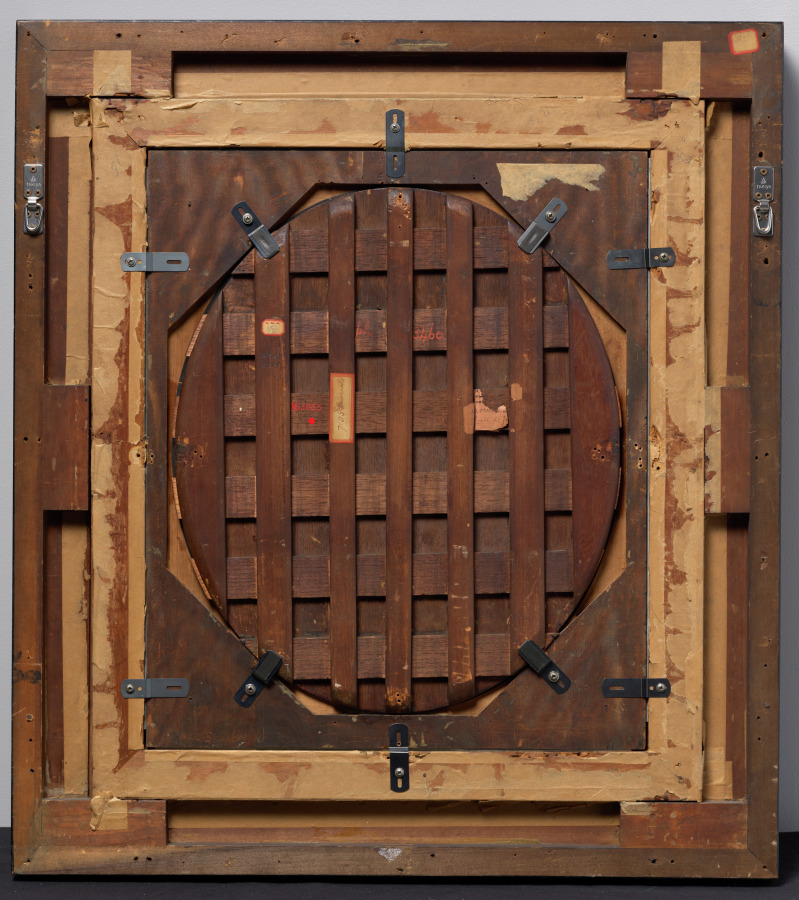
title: Portrait of a Woman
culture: Netherlands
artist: Jan Anthonisz. van Ravesteyn (Dutch, c. 1570–1657)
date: 1620s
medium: oil on wood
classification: Painting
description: How do you conserve a painting when portions are missing? The mid-treatment image (below) shows the painting after cleaning, when earlier restorations had been removed. In the painting on view, notice how the conservator reconstructed portions of the sitter’s lace collar and elaborate necklace. She re-created missing passages after studying the artist’s technique in other works and carefully emulating his treatment of the remaining lace and elements of the twisting, three-dimensional necklace. Conversely, there was not enough information to reconstruct what was probably another ornament at the back of the sitter’s head, so the decision was made not to speculate and invent something in that space.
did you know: The sitter wears several transparent and translucent white collars that become opaque when layered.